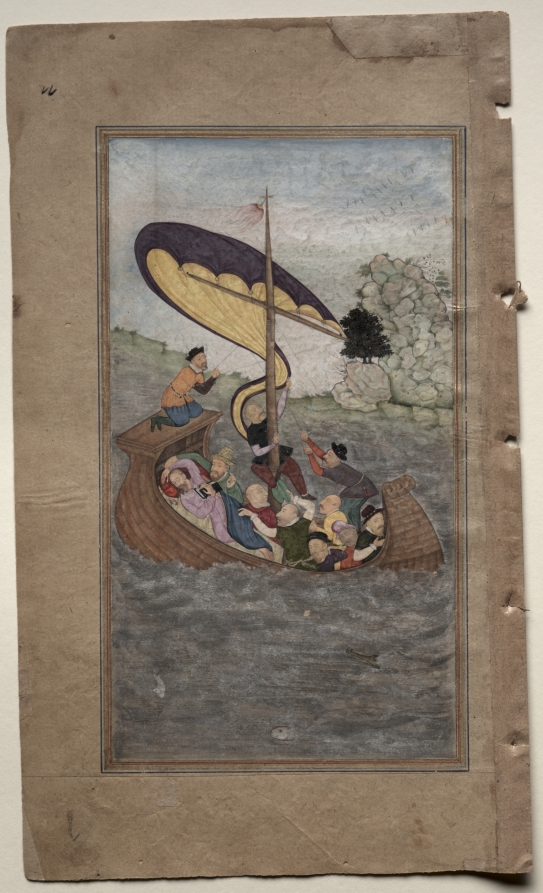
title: Jesus being awakened during a tempest on the Sea of Galilee (folio 77 recto), from a Mirror of Holiness (Mir’at al-quds) of Father Jerome Xavier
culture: Mughal India, Allahabad, made for Prince Salim (1569–1627)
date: 1602–4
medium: Gum tempera, ink, color, and gold on paper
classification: Manuscript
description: The boat carrying Jesus and his apostles encountered a tempest on the Sea of Galilee. As the apostles began to panic and fear that their boat would sink, Jesus continued to sleep peacefully. The painter illustrates the moment before Jesus was awakened by his apostles, who are frightened by the storm and perhaps also by the crocodile that sticks its head out of the waves. The power of the gale is indicated by the violently twisting sail and the Mughal-style tassel that swings at the top of the mast. This composition is the only one in the Cleveland manuscript to be based on an identifiable European print.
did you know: The apostle wearing green appears to be seasick.